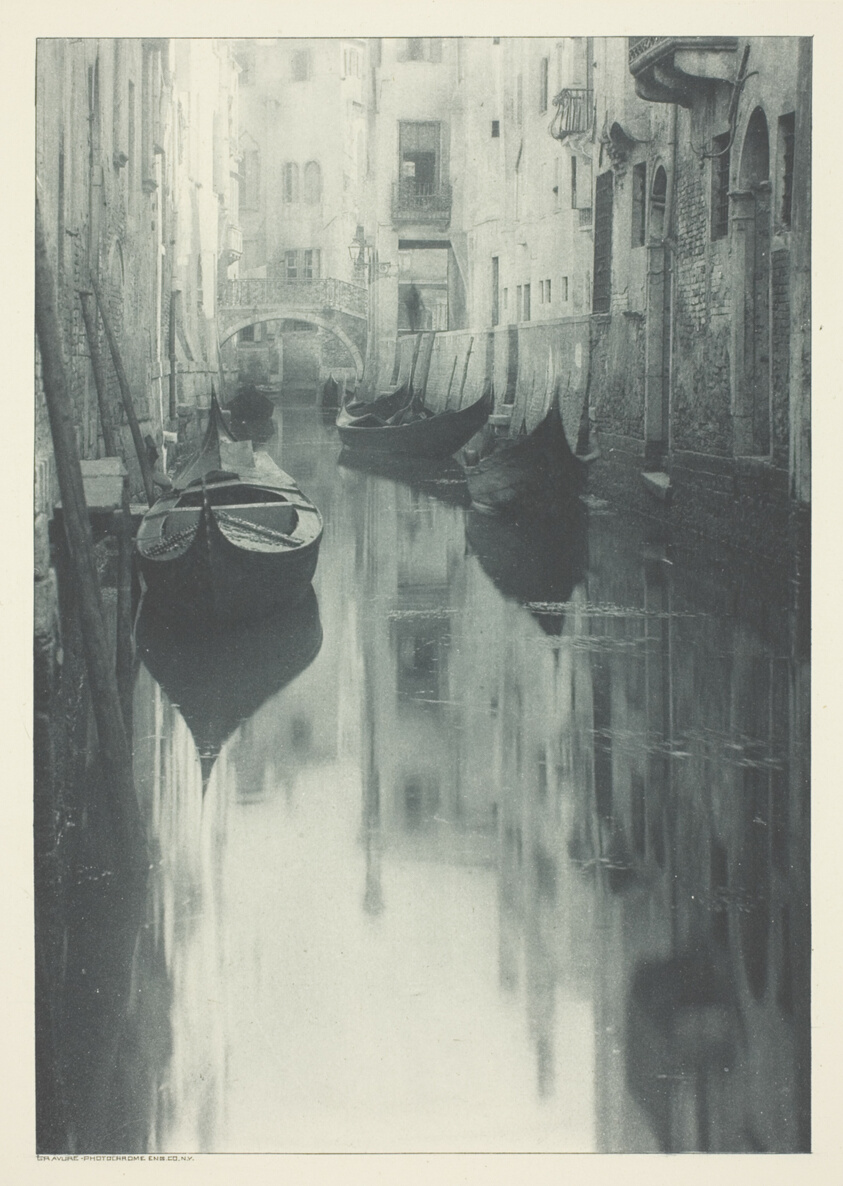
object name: Photograph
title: Reflection-Venice, from the portfolio "American Pictorial Photography, Series I" (1899); edition 146/150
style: 19th century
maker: Alfred Stieglitz (American, 1864–1946)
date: c. 1897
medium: Photogravure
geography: United States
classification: photogravure; photomechanical process; photography; photograph